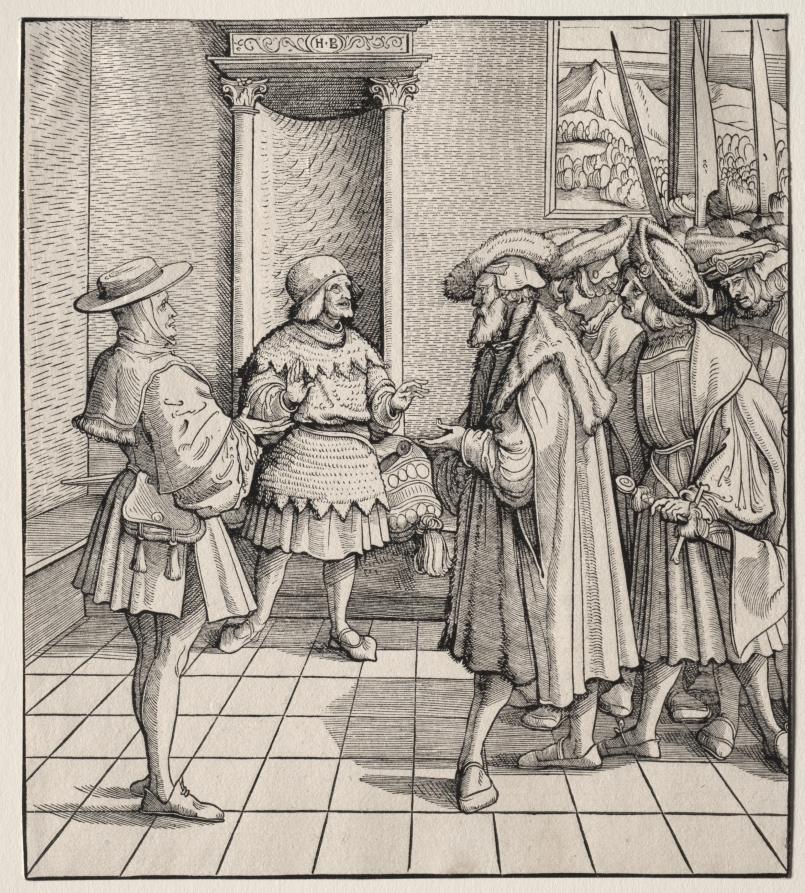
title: The Bad Advice of One Little Man to Another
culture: Germany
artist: Hans Burgkmair (German, 1473–1531)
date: 1512–1516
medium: woodcut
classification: Print